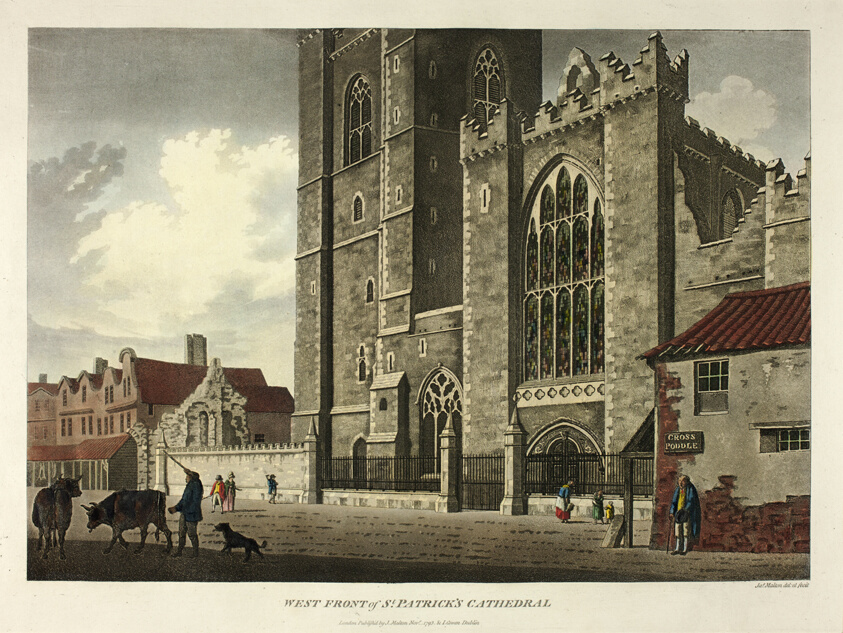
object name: Print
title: West Front of St. Patrick's Cathedral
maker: James Malton (English, 1761-1803)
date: published November 1793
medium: Hand-colored aquatint in black on ivory wove paper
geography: England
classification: aquatint; print; prints and drawing